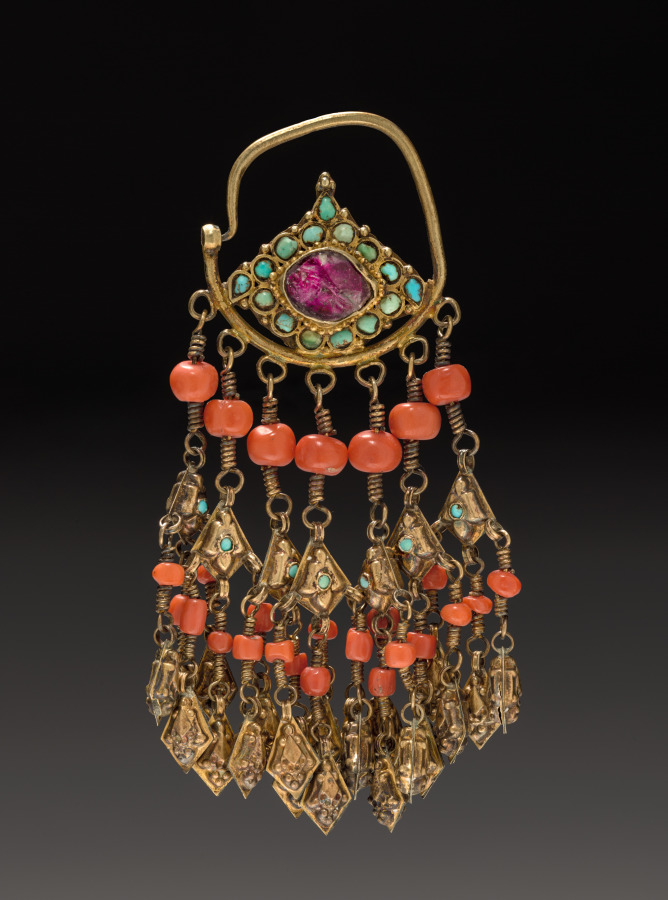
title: Nose Ring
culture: Nepal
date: 1700s–1800s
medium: silver, gilded; turquoise, coral and red glass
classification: Jewelry